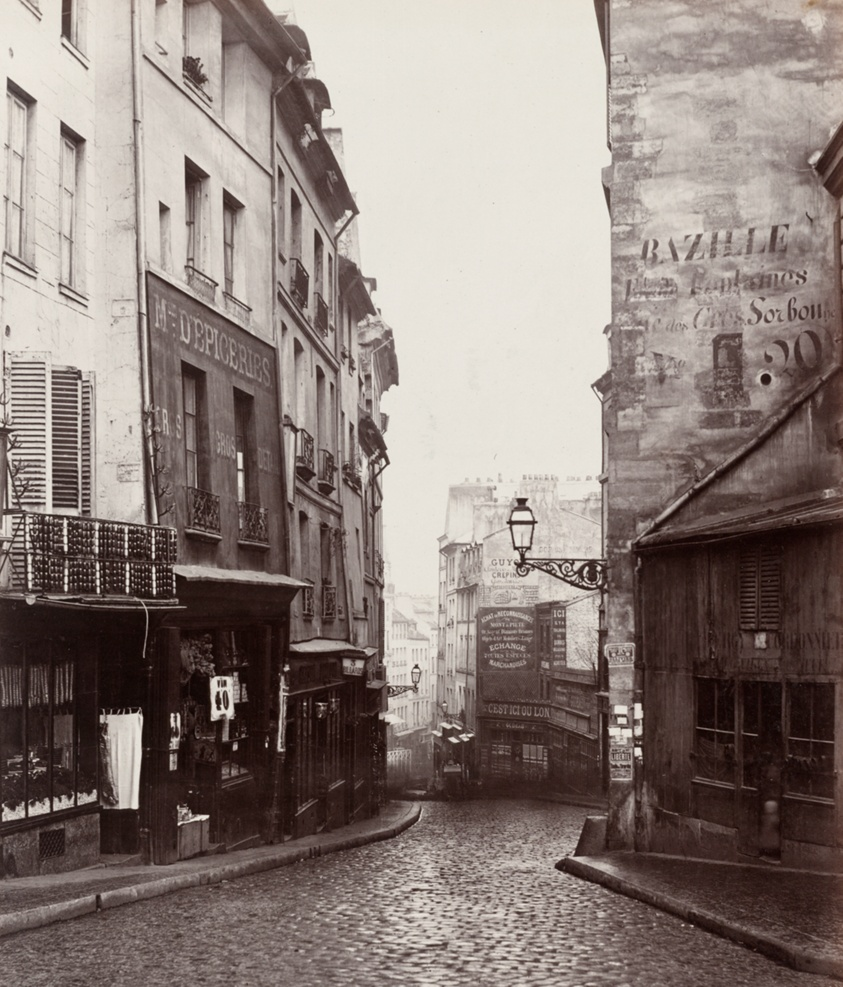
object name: Photograph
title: Rue de la Montagne-Sainte-Geneviève near the Intersection of Rue LaPlace (Rue de la Montagne-Sainte-Geneviève prés de carrefour de la rue LaPlace)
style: 19th century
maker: Charles Marville (French, 1813–1879)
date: 1865/69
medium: Albumen print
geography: France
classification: albumen print from collodion negative; photograph; photography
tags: cityscapes, Paris